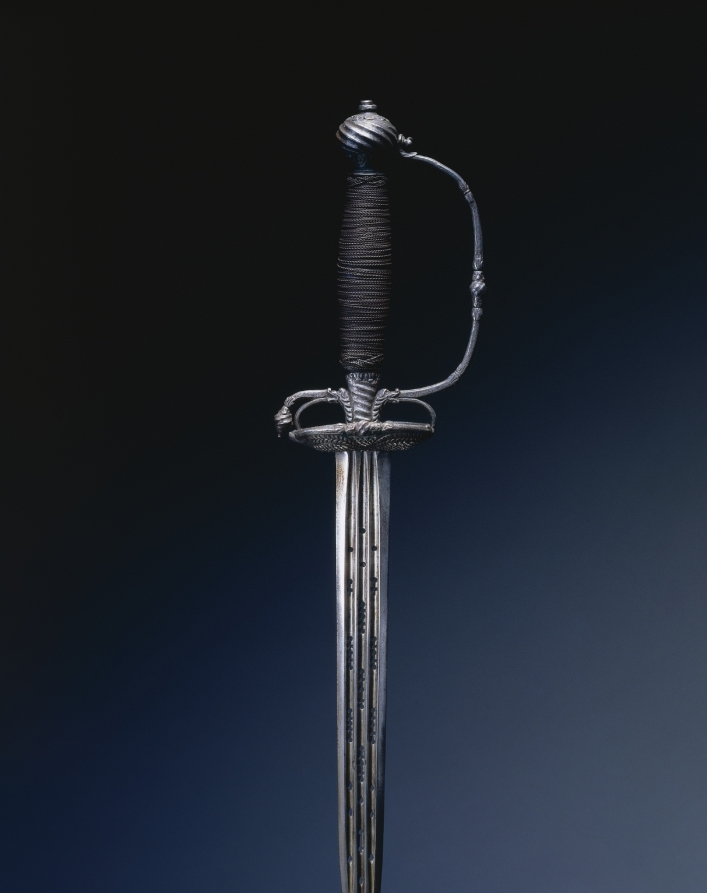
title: Small Sword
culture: England, 18th century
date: c. 1720–60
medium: steel; piercing; perforation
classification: Arms and Armor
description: During the 1700s, the small-sword emerged as a light, quick weapon. Like the rapier it was carried by unarmored civilians, the noblemen of the upper classes. Over time this delicate sword became more an accessory of male attire than a weapon essential to life and death. The sword hilt, which shows even when the blade is sheathed, became the ground for elaborate decoration. These small-swords thus represent the final stage in the evolution of the sword, from the edged weapons of antiquity to the elegantly refined blades of the 1700s and 1800s.